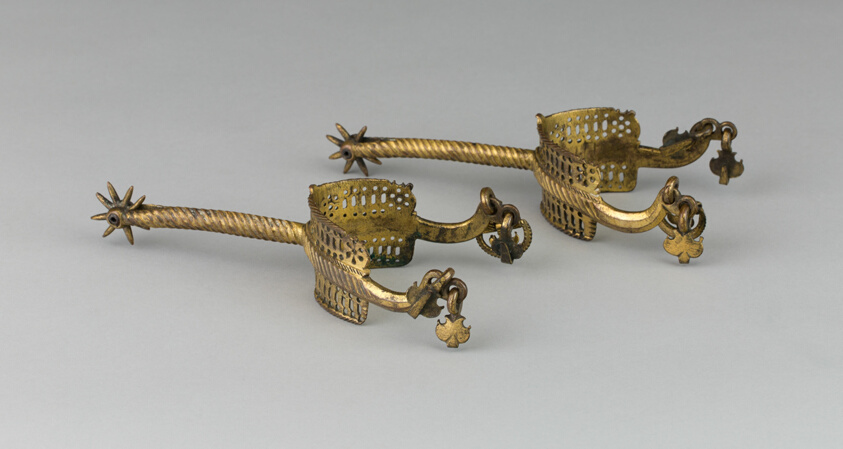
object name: Armor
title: Pair of Rowel Spurs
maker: German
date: c. 1500/25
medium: Brass or bronze with gilding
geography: East Germany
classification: horse equipment; armor; arms and armor